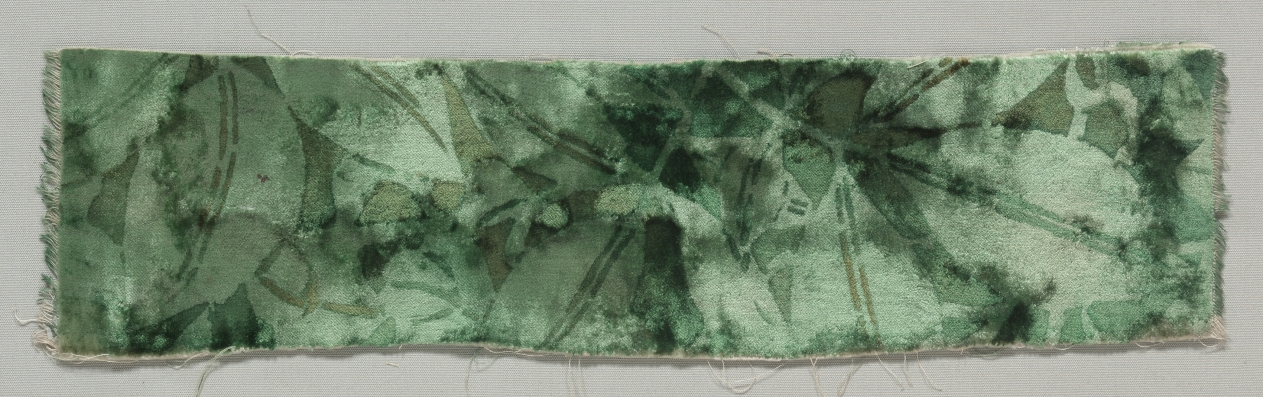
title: Stenciled Velvet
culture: America, New York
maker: Tiffany Studios (United States, New York, 1902–32)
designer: attributed to Dorothy Marshall Hornblower (American, 1886–1968)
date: c. 1902–10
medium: plain silk cloth stencilled with vegetable dyes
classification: Velvet